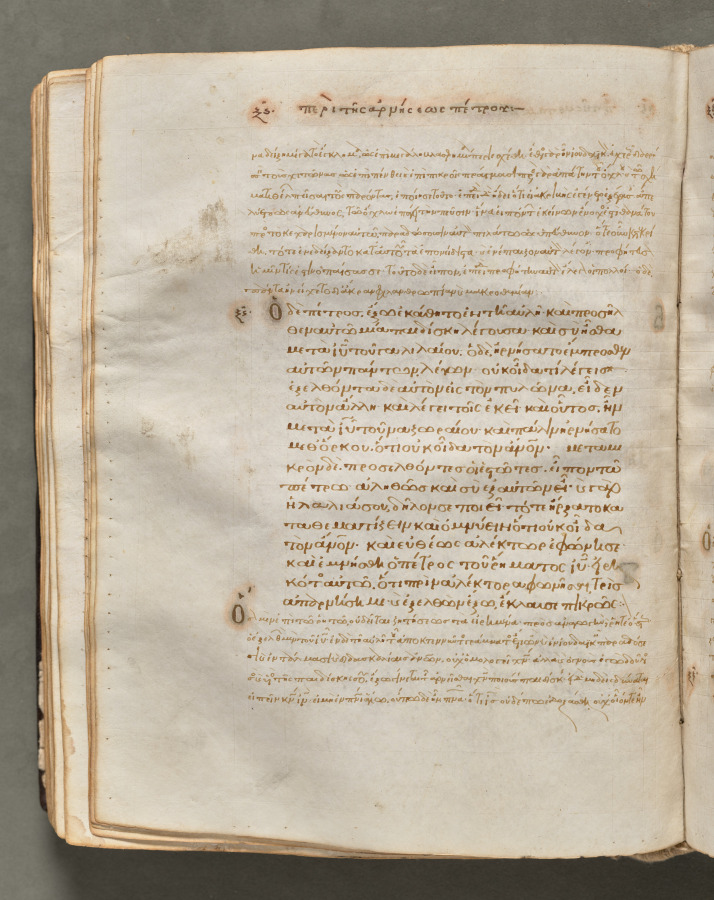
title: Text, folio 121 (verso), from a Gospel Book with Commentaries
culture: Byzantium, Constantinople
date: c. 1000–1100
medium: ink, tempera, and gold on vellum; leather binding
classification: Bound Volume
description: Each of the four gospels in this book opens on a page with brilliantly illuminated borders depicting the author of the text as well as birds-principally peacocks, symbols of the immortality of the soul-and fountains, representing the fountain of life and the salvation of the soul. This volume consists of 428 leaves with texts in Greek. Its level of sophistication suggests that it was probably written and decorated in a monastery in Constantinople.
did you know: Gospel Books were carried in procession through Byzantine churches.